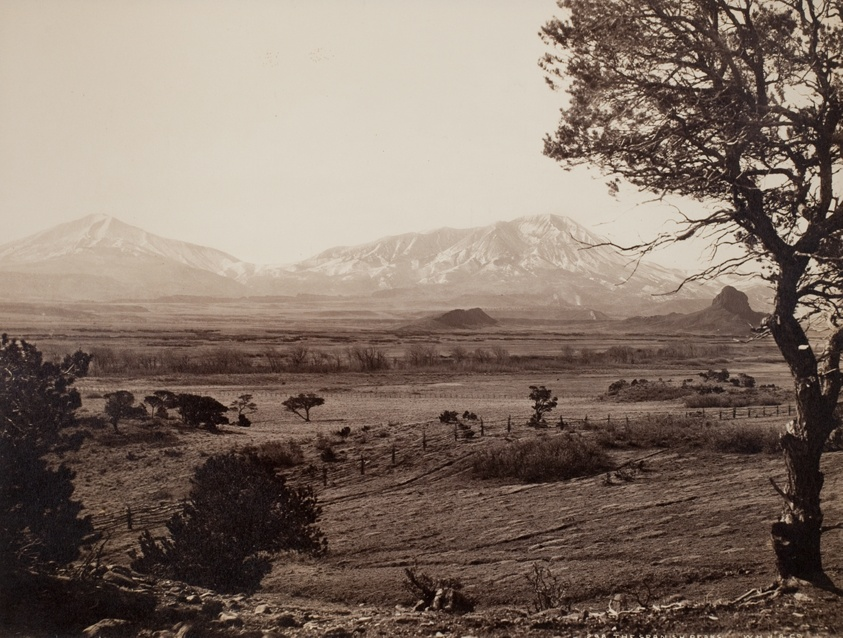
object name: Photograph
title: The Spanish Peaks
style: 19th century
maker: William Henry Jackson (American, 1843–1942)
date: c. 1871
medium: Albumen print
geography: United States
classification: photograph; albumen silver print; photography